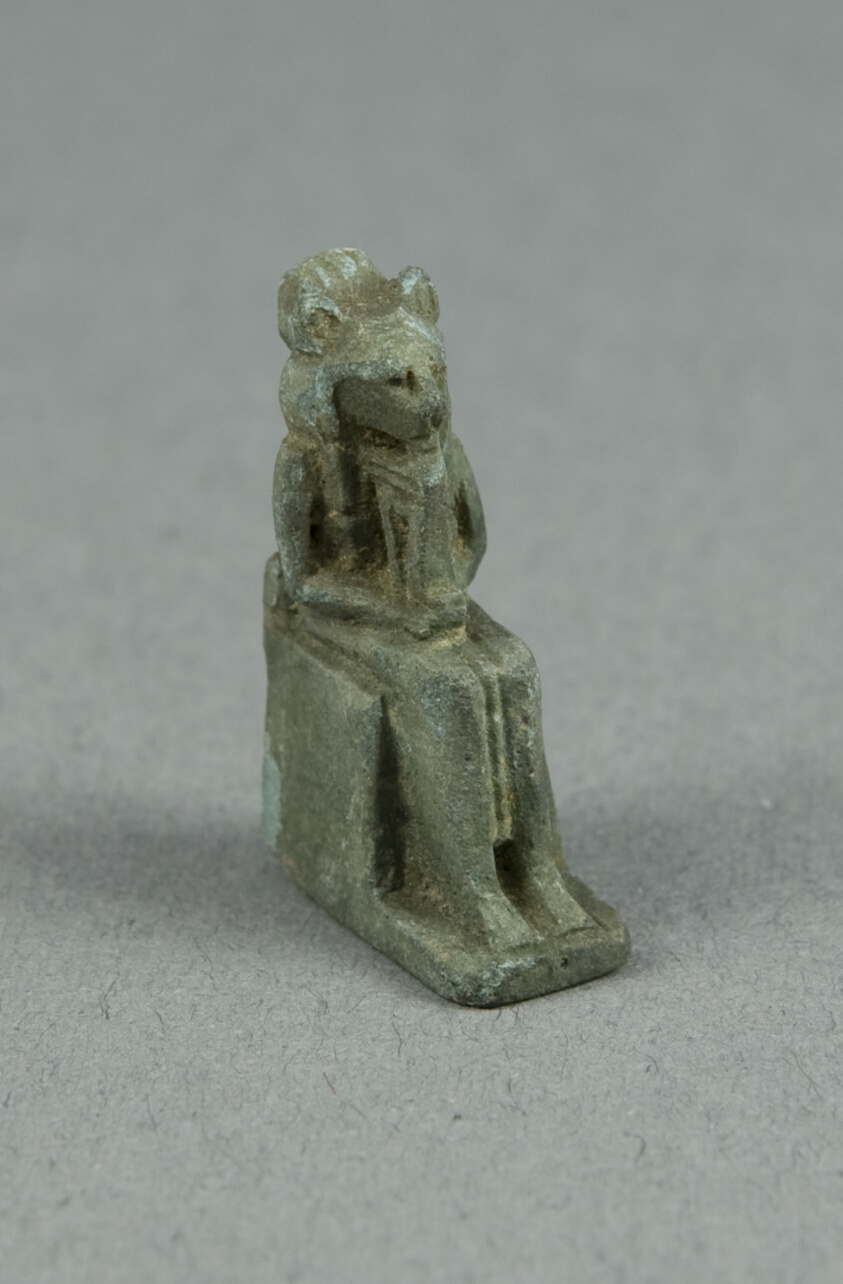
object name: Costume and Accessories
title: Amulet of a Seated Lion-headed Goddess Holding a Sistrum, possibly Bastet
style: egyptian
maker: Egyptian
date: Third Intermediate Period, Dynasties 22–25 (about 945–664 BCE)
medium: Faience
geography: Egypt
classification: amulet; jewelry; ceramics; ancient art; costume; faïence (composite material)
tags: goddesses